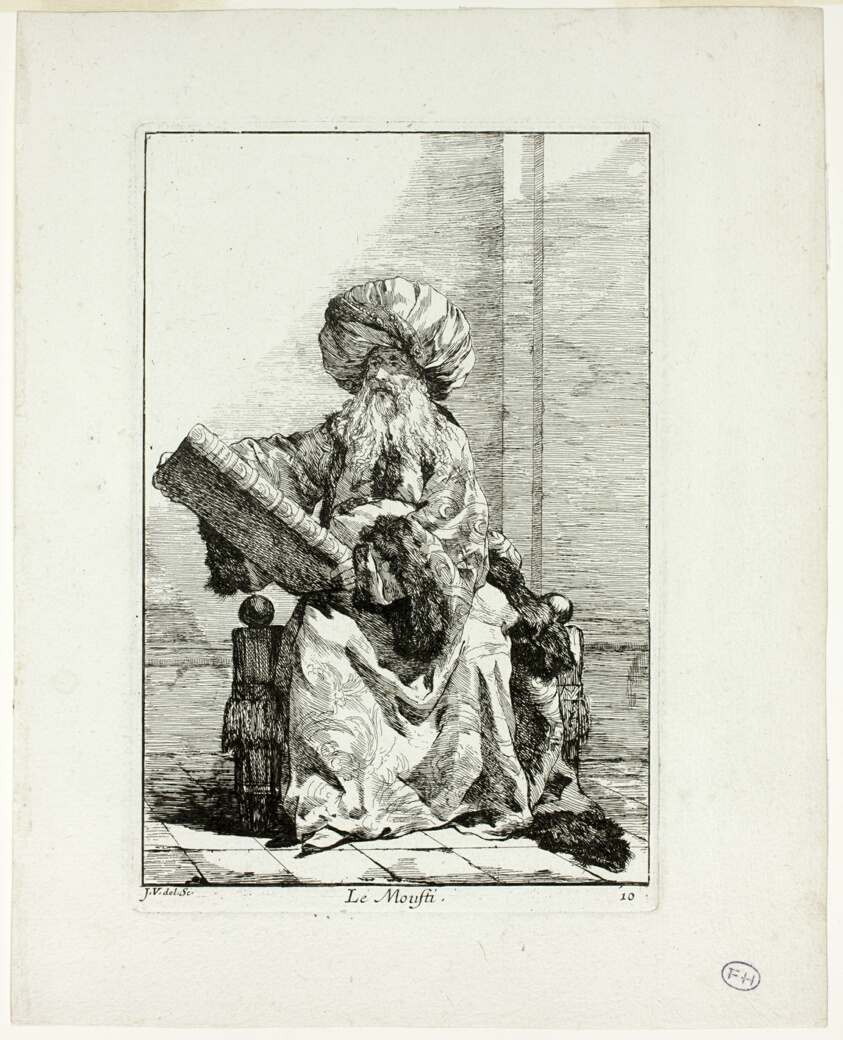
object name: Print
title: Le Moufti, plate ten from Caravanne du Sultan à la Mecque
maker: Joseph-Marie Vien, the elder; French, 1716–1809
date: 1748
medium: Etching on ivory laid paper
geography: France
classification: etching; paper; print; prints and drawing